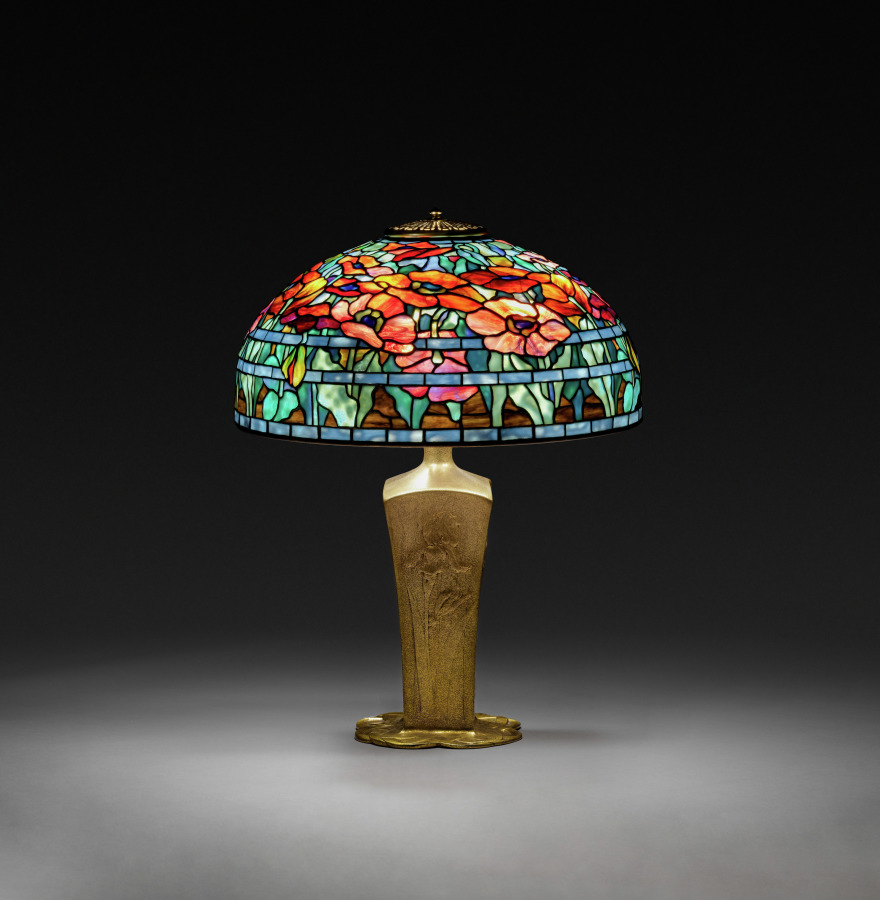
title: Oriental Poppy Table Lamp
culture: America, New York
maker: Tiffany Studios (United States, New York, 1902–32)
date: c. 1902–10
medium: Leaded glass, gilt bronze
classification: Lamp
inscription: TIFFANY STUDIOS NEW YORK 1583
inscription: TIFFANY STUDIOS/NEW YORK/669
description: In the 1870s a renewed emphasis on natural landscapes ushered in a generation of cottage gardeners who delighted in planting perennials in large quantities. Louis Comfort Tiffany was among those who championed the lush, sometimes wild-looking displays of varied floral species in the garden at his Long Island estate, Laurelton Hall. Tiffany encouraged his designers to take inspiration from his garden by shipping fresh cuttings almost weekly to his studios. Ohio native Clara Wolcott Driscoll and her team of female designers created floral patterns for lamps and mosaics based on the colorful blooms of spring that became among the most sought after and commercially successful of Tiffany’s production.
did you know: Louis Comfort Tiffany sold many shades in standardized sizes and shapes so that they could be interchangeable, such as this combination of a poppy shade on an iris base.